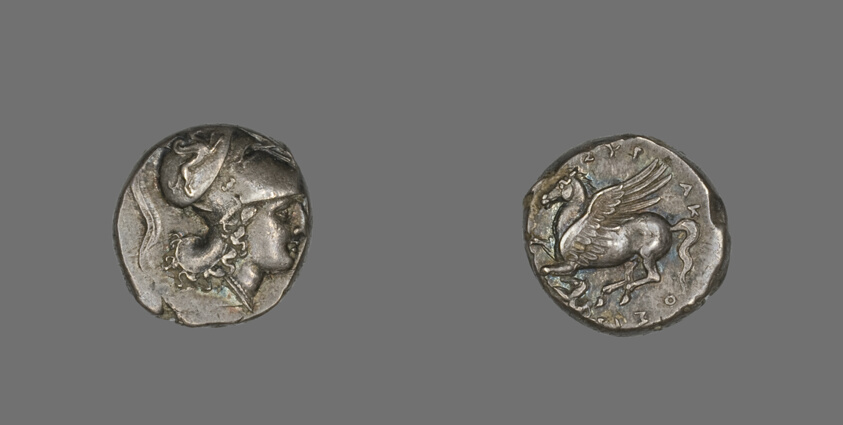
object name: Coin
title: Stater (Coin) Depicting the Goddess Athena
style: greek, ancient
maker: Greek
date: 317-310 BCE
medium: Silver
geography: Syracuse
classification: coin; ancient art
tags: goddesses, mythological figures, pegasus